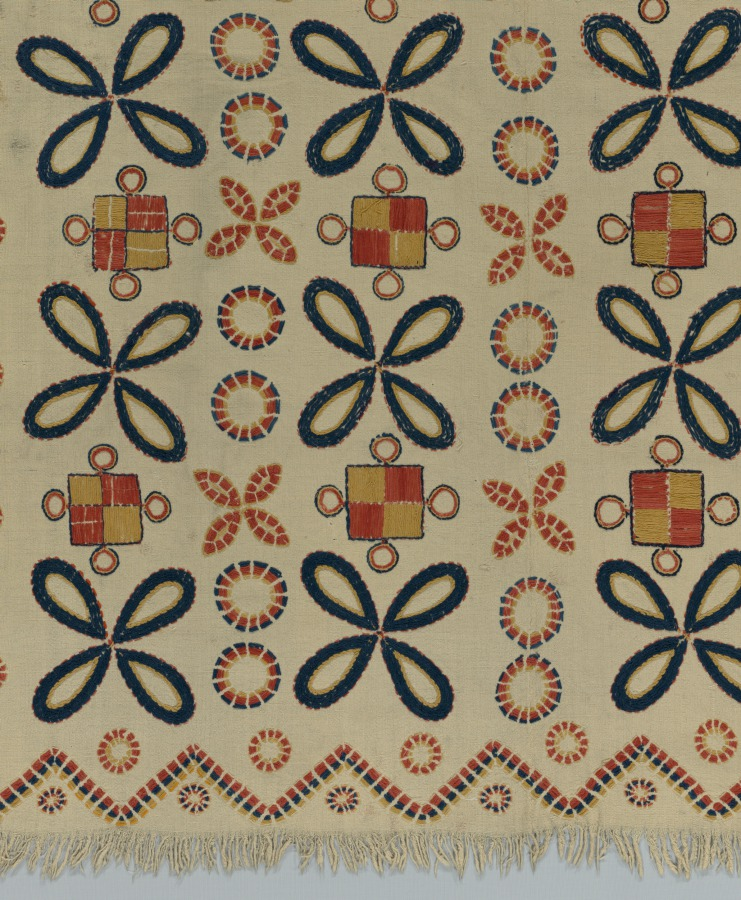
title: Blanket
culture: America, early 19th century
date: early 19th century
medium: hand weave and embroidery: wool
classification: Textile